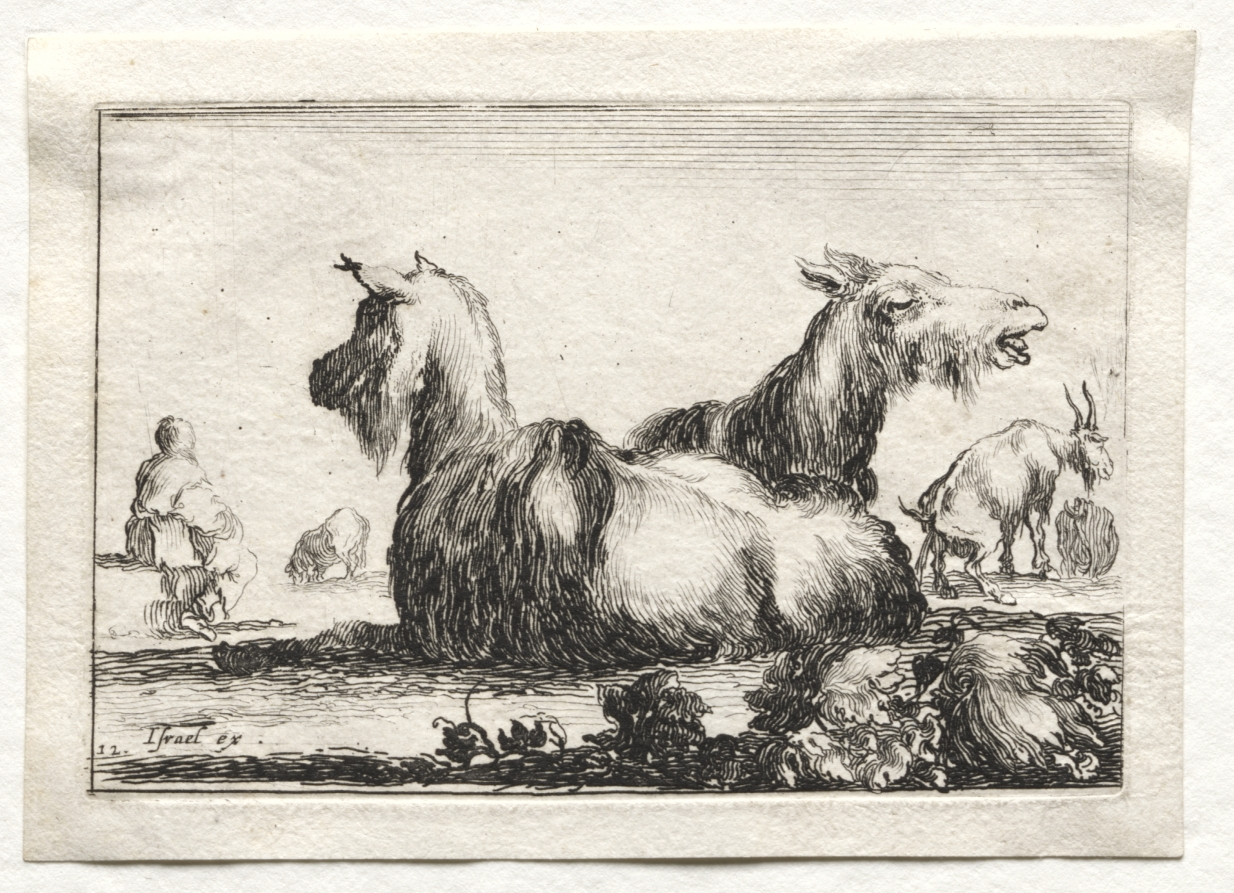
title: Caprices: Two Goats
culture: Italy, 17th century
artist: Stefano Della Bella (Italian, 1610–1664)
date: c. 1642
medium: etching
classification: Print